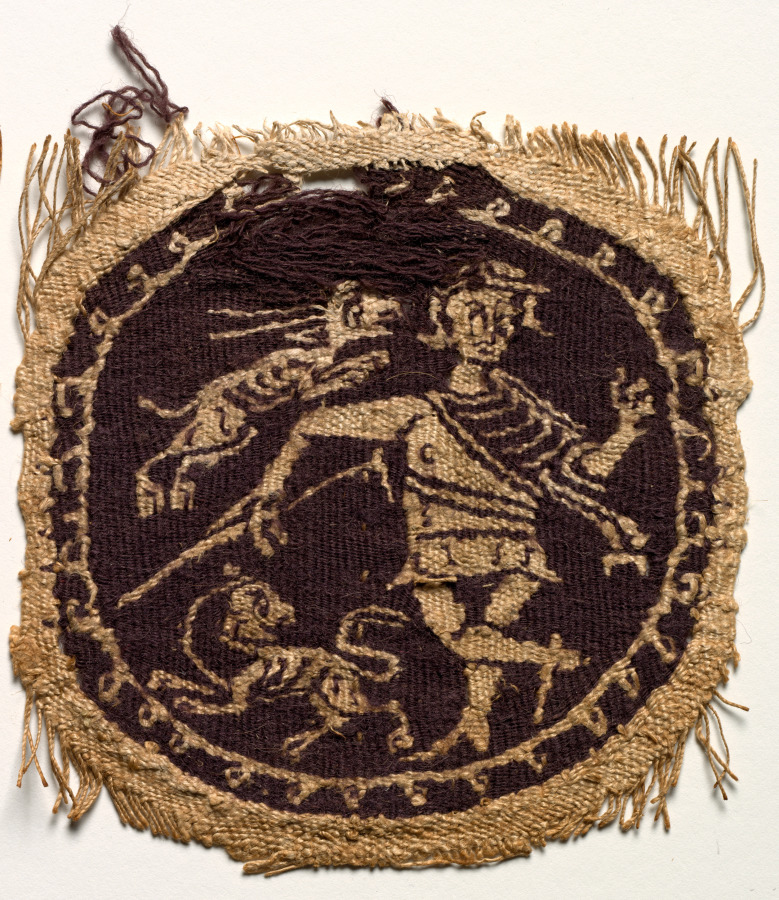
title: Segmentum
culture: Egypt, Umayyad period (661–750) or Abbasid period (750–1258)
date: 700s–900s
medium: Wool and linen: tapestry weave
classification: Textile